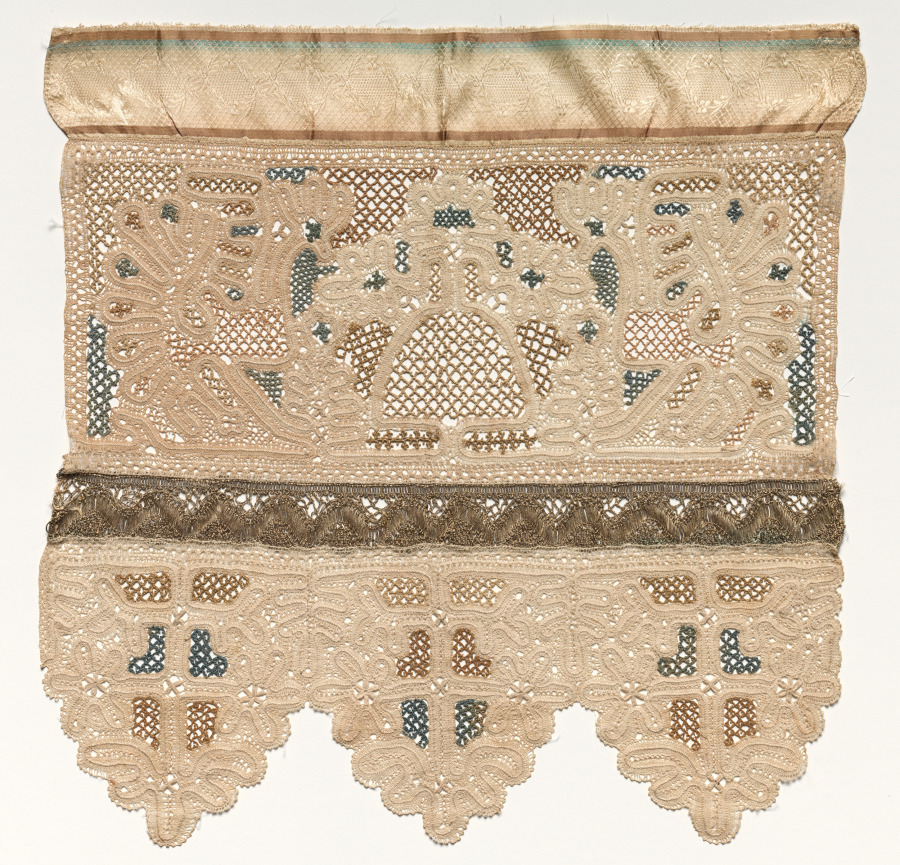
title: Lace Towel End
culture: Russia, Nizhny-Novgorod province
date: c. 1700s–1800s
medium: cotton or linen (est.); straight (continuous) bobbin lace (Vologda tape lace). The tape forms figural or plants motifs outlined with gimp (heavy cord) with a polychrome plaited ground linking the tape; applied silk (est.) ribbon and metal thread trim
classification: Embroidery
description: This Russian lace panel was likely used to embellish the end of a bathing towel. Textiles of this type are valuable for their fine lace making including ancient folk motifs, ritual significance, exemplification of the role of textiles in their society, and in this case, connection to a prominent woman collector, Natalia de Shabelsky, without whom this textile and others like it might have been lost.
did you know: Embellishing the ends of everyday towels was a common folk tradition in many cultures because it displayed the skill of the mother or daughter who made this lace.